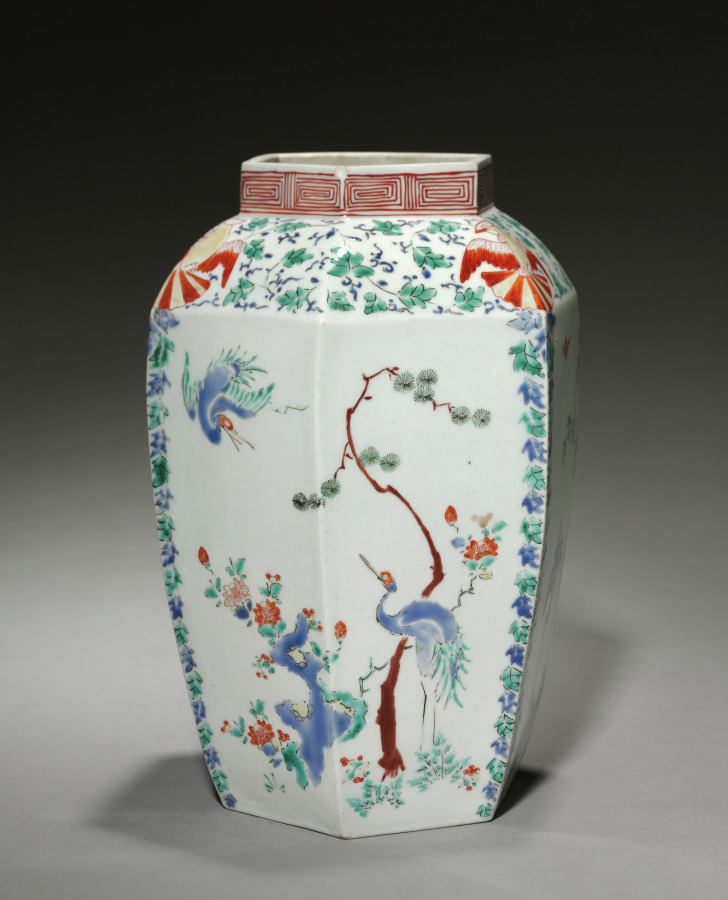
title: Hexagonal Jar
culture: Japan, Edo period (1615–1868)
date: late 1600s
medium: porcelain with overglaze enamel and gold decoration (Hizen ware, Kakiemon type)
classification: Ceramic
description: This pair of jars originally possessed domed lids. Their imposing size, shape, and Chinese-style décor identify them as products made for the European markets in England, Holland, France, and Germany. Indeed many similar examples can be seen in museum and historic house collections in those countries. Such Kakiemon ware also inspired domestic porcelain production in Europe in the 18th and 19th centuries.